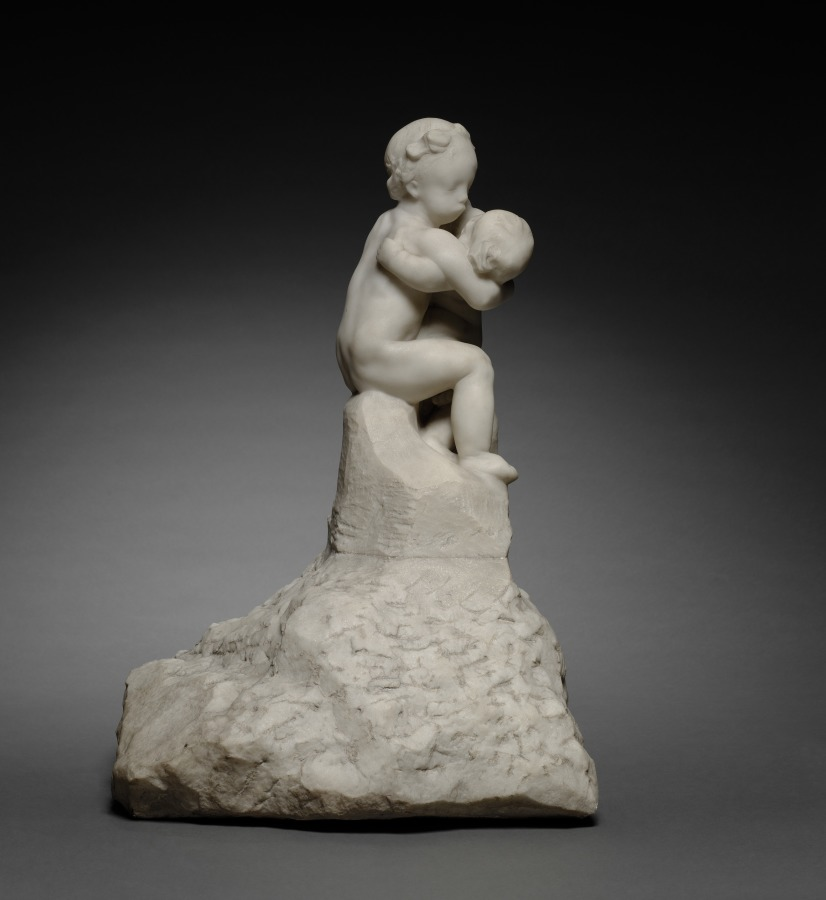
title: Little Brother and Sister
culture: France, early 20th Century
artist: Auguste Rodin (French, 1840–1917)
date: 1916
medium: marble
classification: Sculpture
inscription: Signed on base beneath figures: "A. Rodin"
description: Rodin spent years exploring new ways of representing the human emotions of love and affection experienced at different stages of life. The bodies and gestures of the children here suggest an innocent foreshadowing of the mature couple in the artist’s celebrated sculpture The Kiss of 1882. Both works feature a strong tactile contrast between the rough-hewn lower area and the smooth surfaces of the nude body above. Upwardly spiraling forms, combined with shifting areas of light and shadow, infuse the sculpture with dynamic energy.